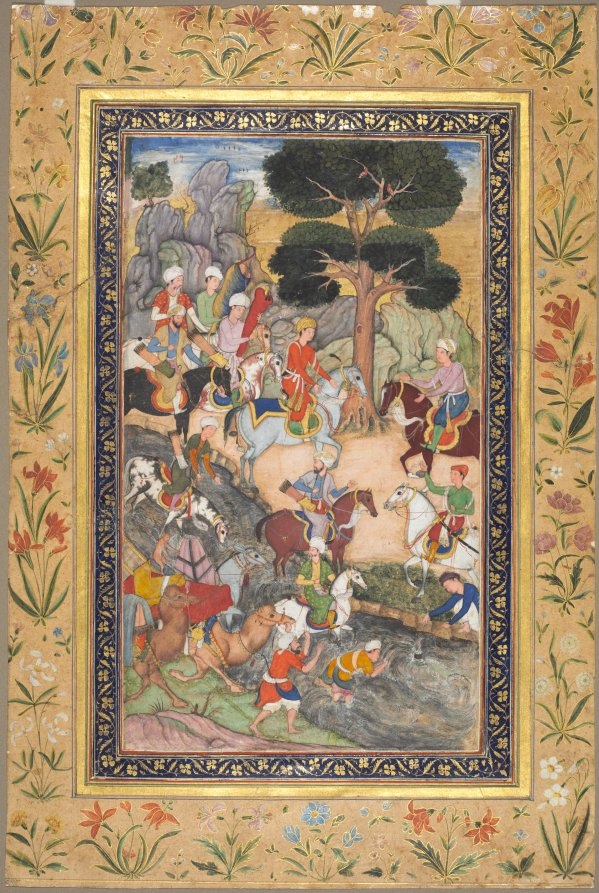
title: Babur meeting with Sultan Ali Mirza at the Kohik River, from a Babur-nama (Memoirs of Babur)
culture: India, Mughal school, 16th century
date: c. 1590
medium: Gum tempera and gold on paper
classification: Painting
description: Thirty years before he captured Delhi and founded the Mughal Empire, Babur began his expansionist activities at the age of 13, as depicted in this painting of an encounter that took place in 1496. Having traveled long distances across harsh dry terrain, Babur confronted one of his rivals who, like him, was angling to march on and conquer the illustrious city of Samarkand, the former capital of his ancestor Timur.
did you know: Camels carry collapsed tents to be pitched for nightly encampments and parties.